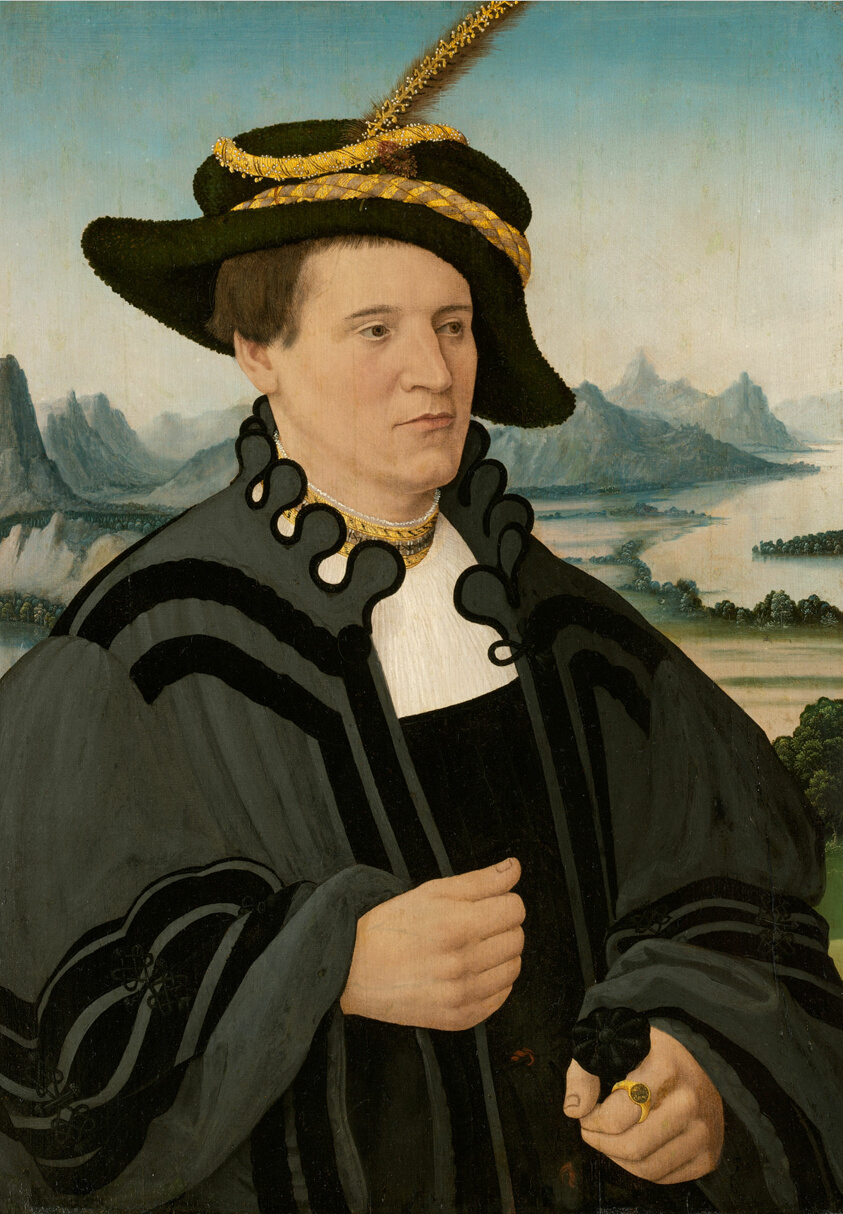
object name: Painting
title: Portrait of Fridrich Rorbach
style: sixteenth century, 16th Century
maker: Conrad Faber von Creuznach (German, c. 1500–by 1553)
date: 1532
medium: Oil on panel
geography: Germany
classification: oil on panel; german; oil paintings (visual works); paint; portrait; painting; european painting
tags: portraits: male subject, black (color), coat of arms, feathers, Germany, hat, jewelry, landscape, luxury, marriages/weddings, mountain, mountains, portrait, portraits, river, water, wealth